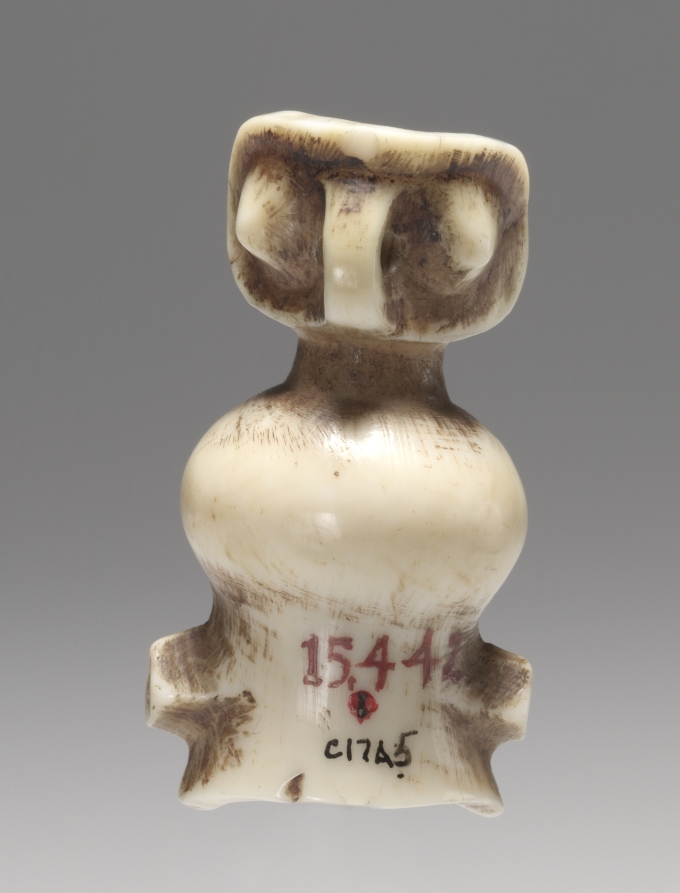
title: Whistle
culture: Africa, Central Africa, Democratic Republic of the Congo or Angola, Chokwe-style maker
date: late 1800s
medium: Probably hippopotamus ivory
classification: Musical Instrument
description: Carved out of ivory or wood in a variety of shapes, Chokwe whistles often bear miniature, stylized renderings of masks. Cikunza, the "patron saint" of the boys' initiation into manhood, is depicted with a pointed extension imitating the horn of a road antelope, symbolizing the fertility spirit. Typically such whistles were used by men during the hunt to communicate with their co-hunters and to call their dogs. They were either worn attached to a string as a necklace or tied to a spear.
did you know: This whistle is the first piece from sub-Saharan Africa acquired by the CMA.